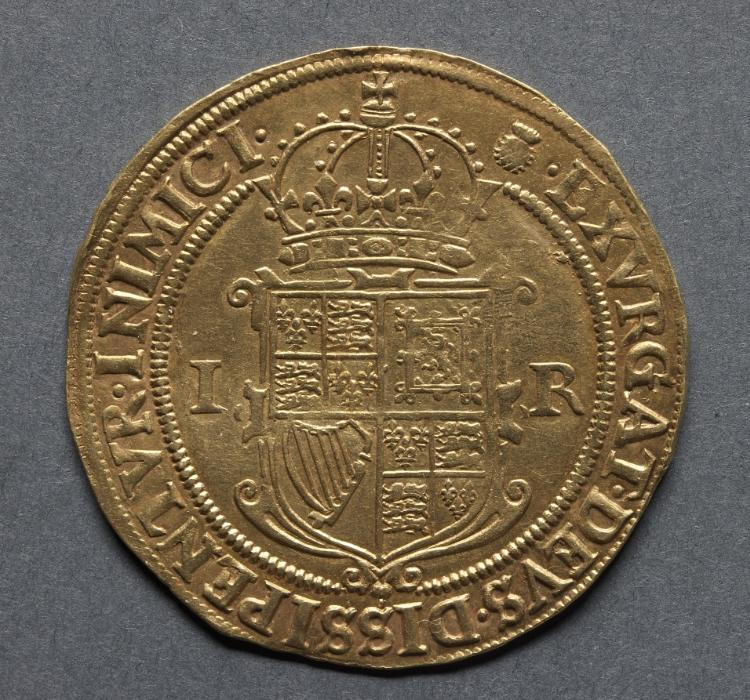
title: Sovereign: Crowned Shield with arms of England, Scotland, and Ireland (reverse)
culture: England, James I, 1603-1625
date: 1603–1604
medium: gold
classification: Coins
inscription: EXVRGAT. DEVS. DISSIPENTVR. INIMICI.